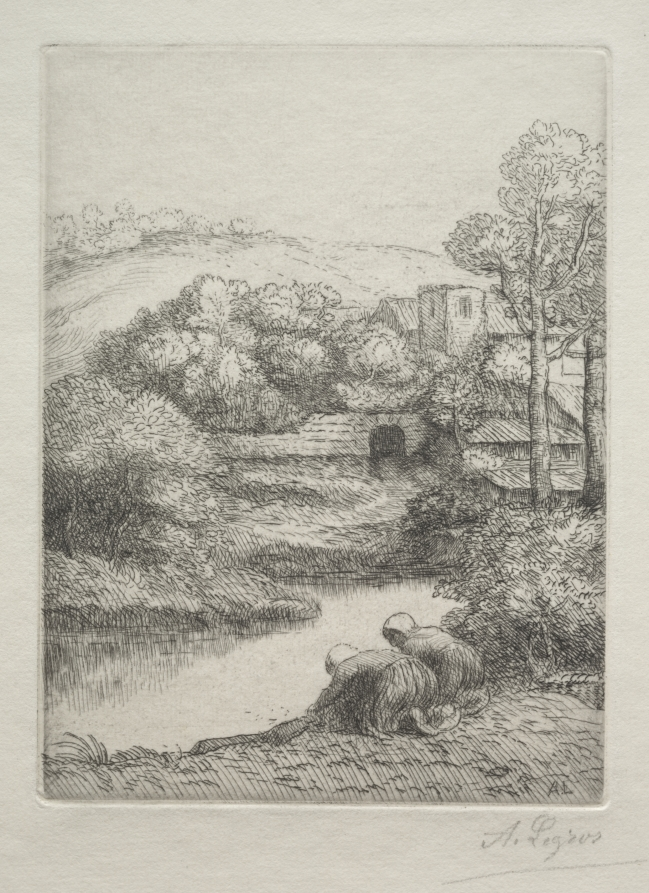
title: The Washing Place, called The Washerwomen (Le Lavoir, Dite "Les Laveuses")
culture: France, 19th century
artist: Alphonse Legros (French, 1837–1911)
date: c. 1857–1911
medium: drypoint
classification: Print